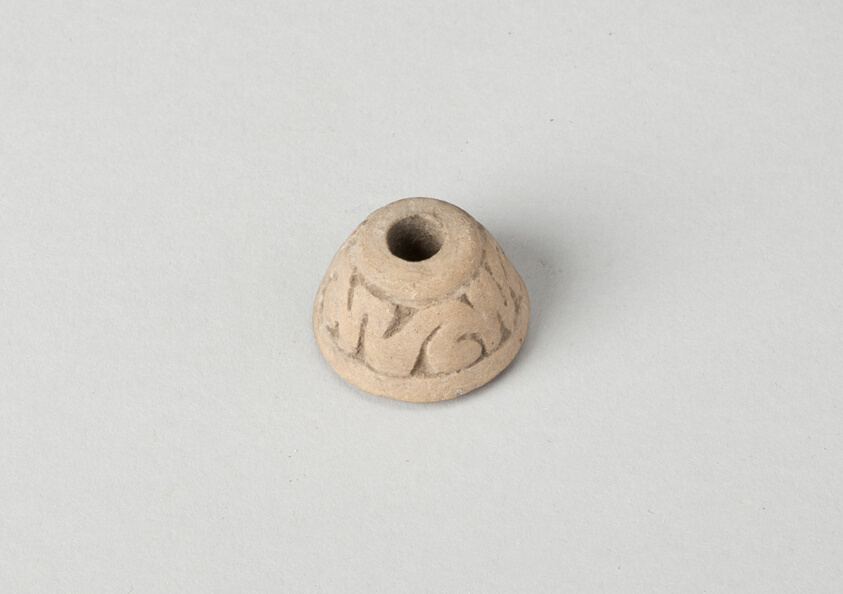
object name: Decorative Arts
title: Ear Ornament or Spindle Whorl with Modeled Design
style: aztec, mesoamerican, Pre-Columbian, americas, Arts of the Americas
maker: Aztec (Mexica) (Valley of Mexico, Mexico)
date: 1450–1521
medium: Ceramic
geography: Valley of Mexico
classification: earthenware; american decorative arts; ceramics; jewelry; art of the americas; decorative arts